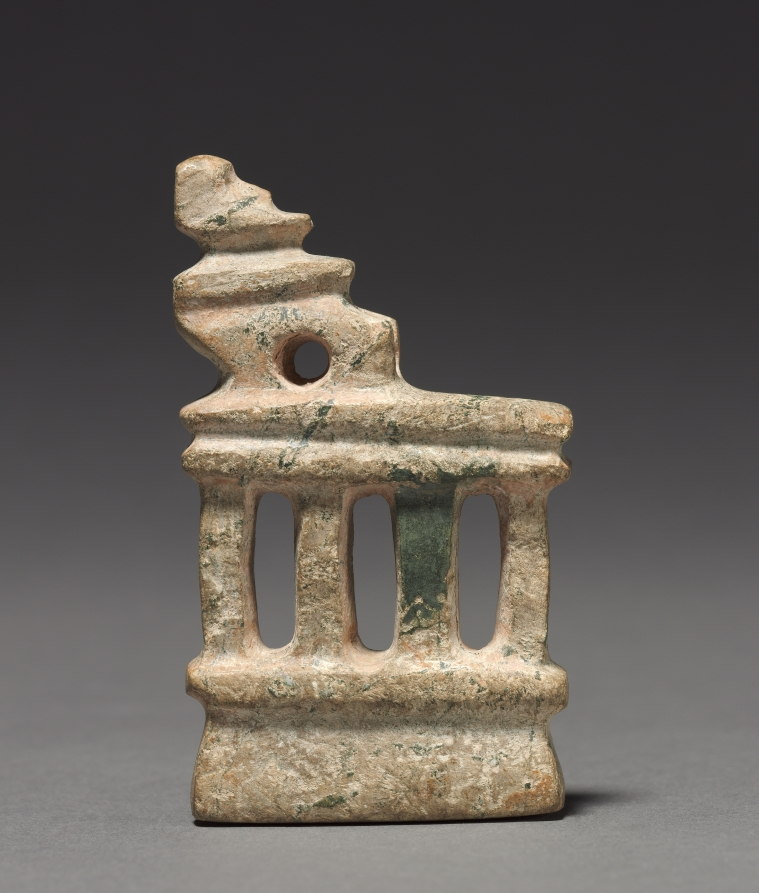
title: Architectural Model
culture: Mesoamerica, Mexico, Guerrero, Mezcala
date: 100 BCE–300 CE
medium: serpentine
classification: Sculpture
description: The Mezcala style takes its name from a river in its homeland, the Guerrero region of western Mexico. The style is known for small-scale stone sculptures including architectural “models” characterized by sleek abstraction. Because comparisons to actual architecture in the Mezcala region are scarce, it is not known whether the models refer to temples, houses, or underground funerary structures.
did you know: The Mezcala style was first recognized and defined in 1956.